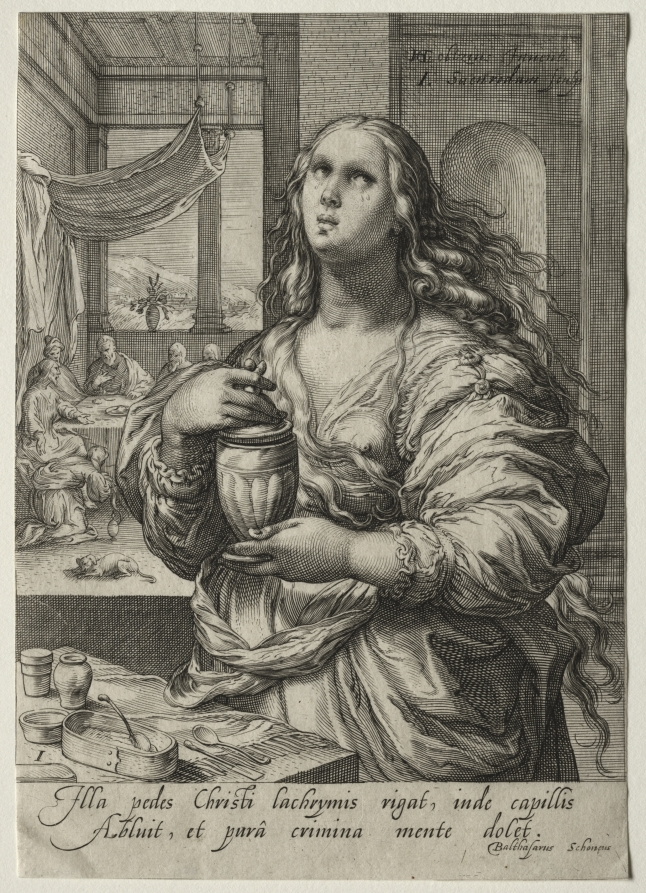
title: Heroines of the New Testament: Mary Magdalen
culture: Netherlands, 16th century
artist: Jan Saenredam (Dutch, 1565–1607)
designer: after Hendrick Goltzius (Dutch, 1558–1617)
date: c. 1595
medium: engraving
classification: Print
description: Mary Magdalene bathing Christ’s feet is relegated to a tiny vignette in the background of this engraving. Nearly all of the foreground space is devoted to the weeping Magdalene, her voluptuous beauty referencing her previous life as a prostitute. She holds a vessel containing the ointment she will use to bathe Christ’s feet.